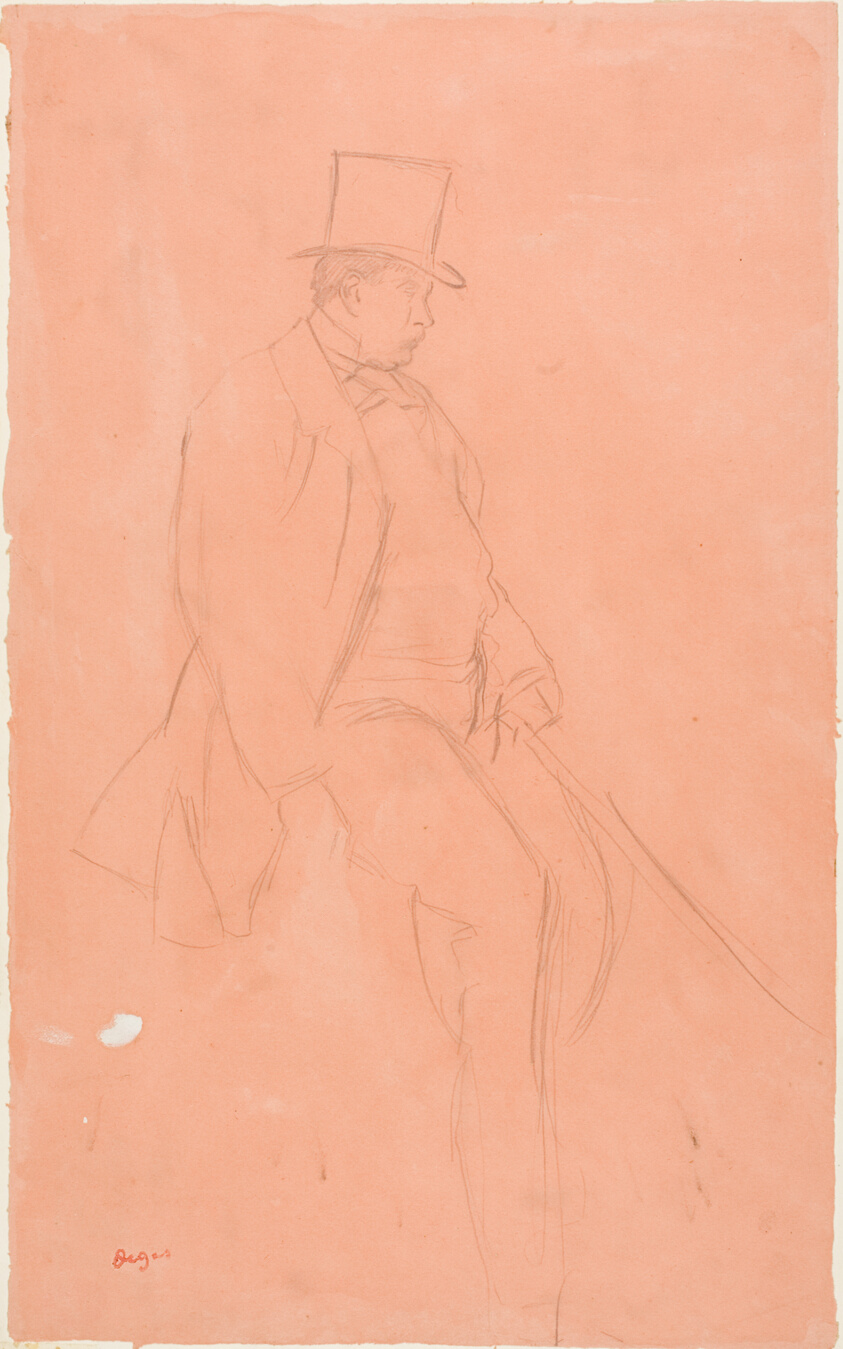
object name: Drawing and Watercolor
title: Gentleman Rider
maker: Edgar Degas; French, 1834-1917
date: 1866/70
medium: Graphite, with traces of brush and white gouache, on pink wove paper, laid down on cream board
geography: France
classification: graphite; drawings (visual works); prints and drawing; paper